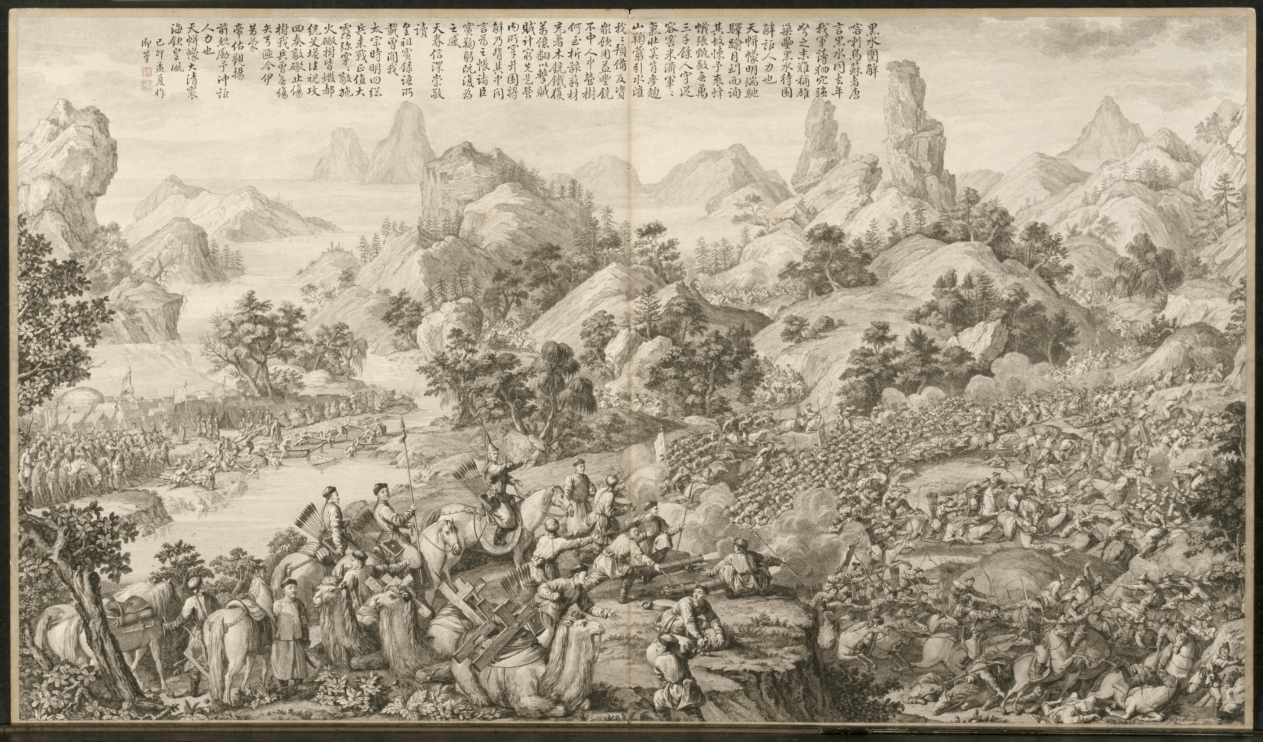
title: Breaking Through the Siege at Hesui: from Battle Scenes of the Quelling of Rebellions in the Western Regions, with imperial Poems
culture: China, Qing dynasty (1644–1911), Qianlong reign (1736–95)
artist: Giuseppe Castiglione (Italian, 1688–1766)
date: c. 1765–74; poem dated 1759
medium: etching, mounted in album form, 16 leaves plus two additional leaves of inscriptions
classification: Print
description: This set of etchings was commissioned by Emperor Qianlong to record in pictorial terms the courage of his generals and soldiers in quelling the rebellions in the Western Regions. Qianlong added his own poem to each of the etchings, indicating his appreciation and pride in this demonstration of military might. "Western Regions" refers to the present-day Xingjiang province, often described in Western writing as "Central Asia."